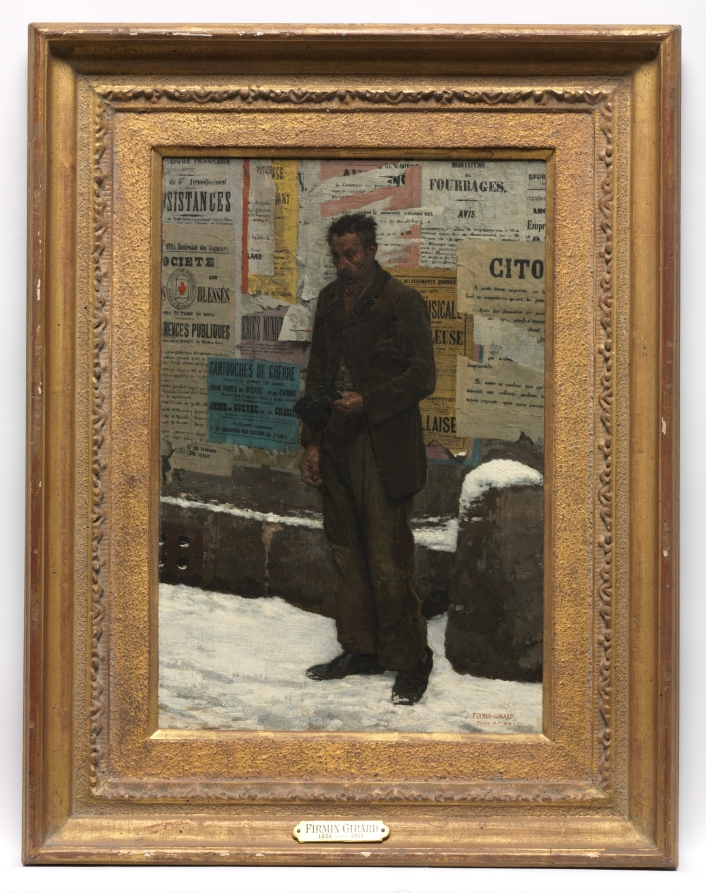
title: The Veteran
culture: France, 19th Century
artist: Marie-François Firmin-Girard (French, 1838–1921)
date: 1870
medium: oil on canvas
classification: Painting